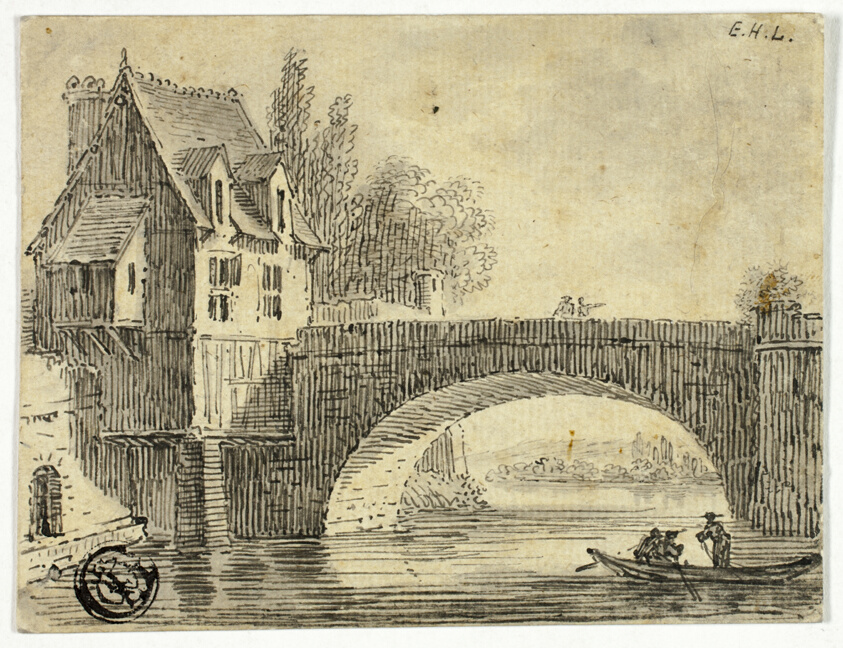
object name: Drawing and Watercolor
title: Bridge with House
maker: Unknown Artist; possibly 18th century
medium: Pen and black ink, with brush and gray wash, on cream laid paper, laid down on cream laid paper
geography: Unknown Place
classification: pen and ink drawings; drawings (visual works); prints and drawing